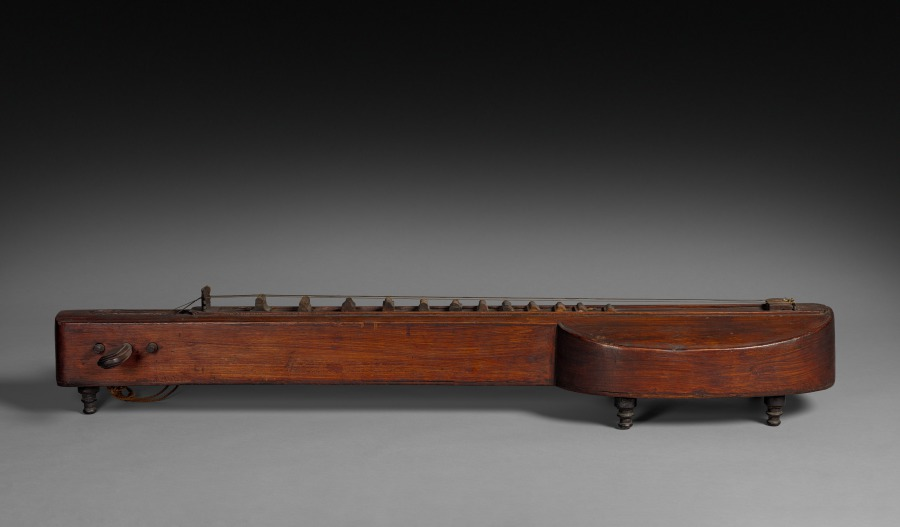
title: Ta'khe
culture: Cambodia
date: 1800s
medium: Tropical hardwood with ferrous metal and silk strings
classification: Musical Instrument